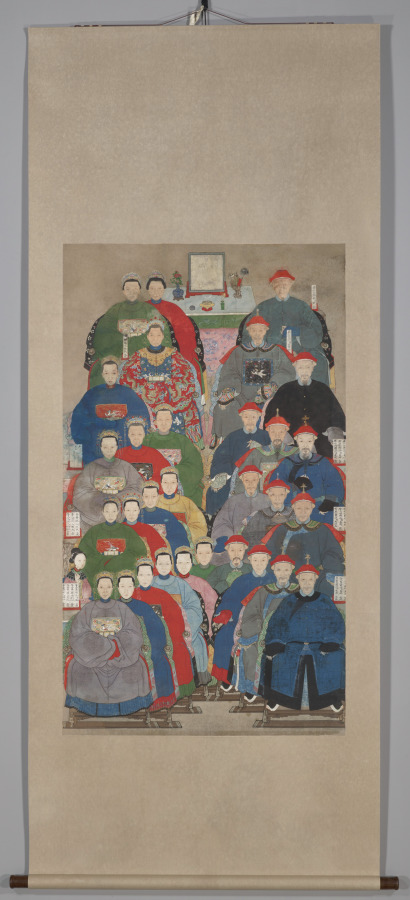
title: Ancestor Group Portrait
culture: China, Qing dynasty (1644-1911), Jiaqing period (1796-1820)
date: 1796–1820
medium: Hanging scroll; ink and color on paper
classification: Painting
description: From top to bottom this scroll features various generations of ancestors with men on the right and women on the left, 30 figures altogether. Inscribed tablets give their rank and relation within the family. Square badges on their robes indicate each figure's rank as an official. Scrolls of this type were displayed for worship at home during the New Year celebrations.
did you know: Court officials' wives could wear the same rank badge as their spouses.